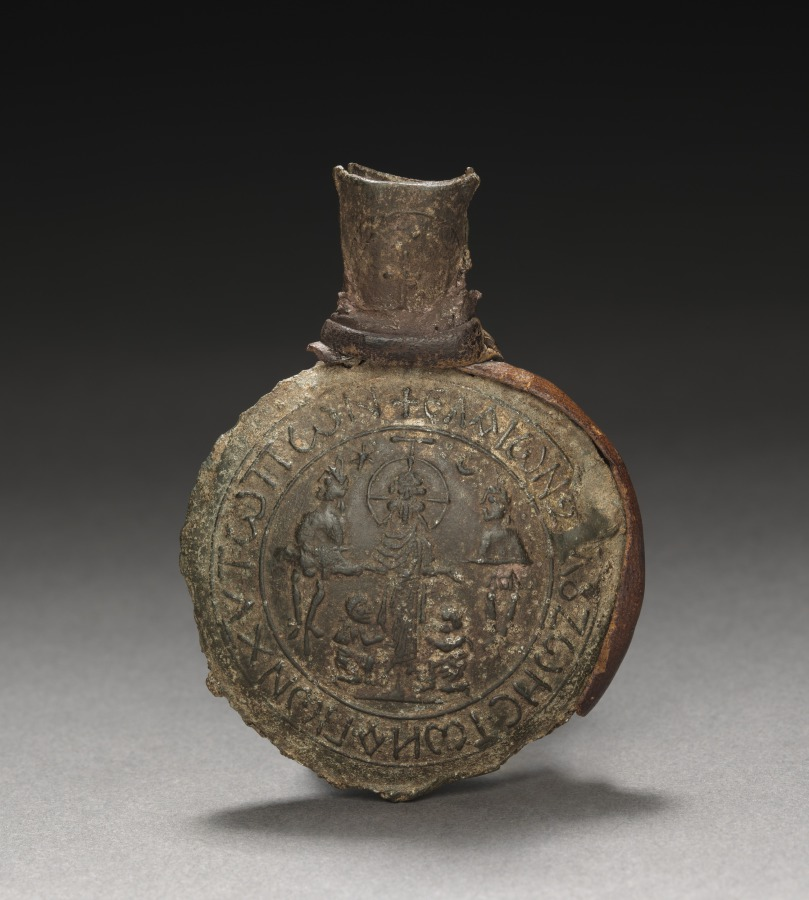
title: Pilgrim's Ampulla with the Crucifixion (front)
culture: Byzantium, Palestine, early Byzantine period, early 7th Century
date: c. 600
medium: tin-lead alloy with leather fragments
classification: Metalwork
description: The images found on the sides of surviving lead pilgrims' ampullae include scenes relating to the life of Christ, and by extension to the holy sites (loca sancta) where the events took place. Cast into the sides of this ampulla are scenes of Christ's Crucifixion on the front and the Ascension on the back. The use of such sacred images on these vessels illustrates the early Christian belief that images were carriers of divine power. This ampulla is known as a "Monza" or "Bobbio" type after caches of similar examples discovered in those two Italian towns.